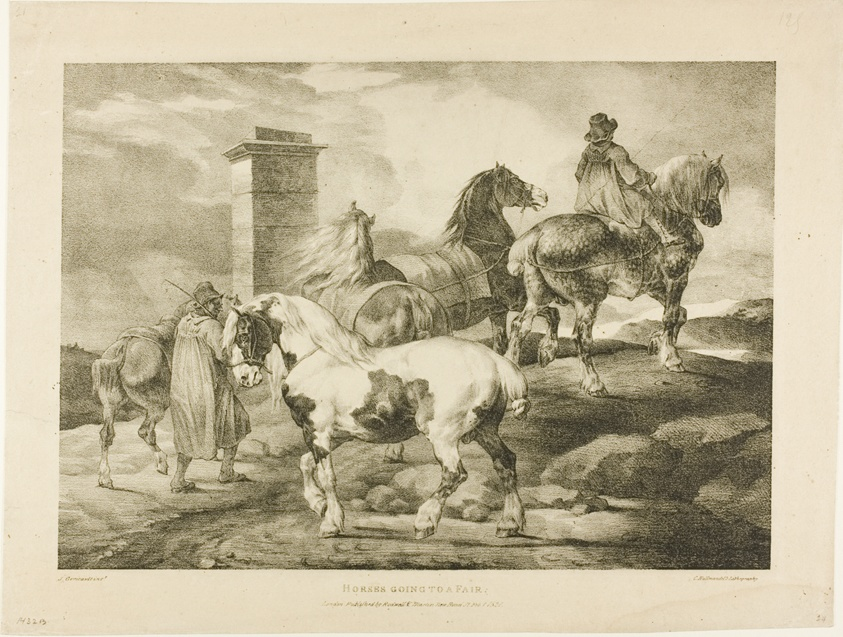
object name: Print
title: Horses Going to a Fair, plate 3 from Various Subjects Drawn from Life on Stone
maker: Jean Louis André Théodore Géricault (French, 1791-1824); printed by Charles Joseph Hullmandel (German and English, 1789-1850); published by Rodwell and Martin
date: 1821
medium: Lithograph in black on buff wove paper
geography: France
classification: lithograph; print; prints and drawing